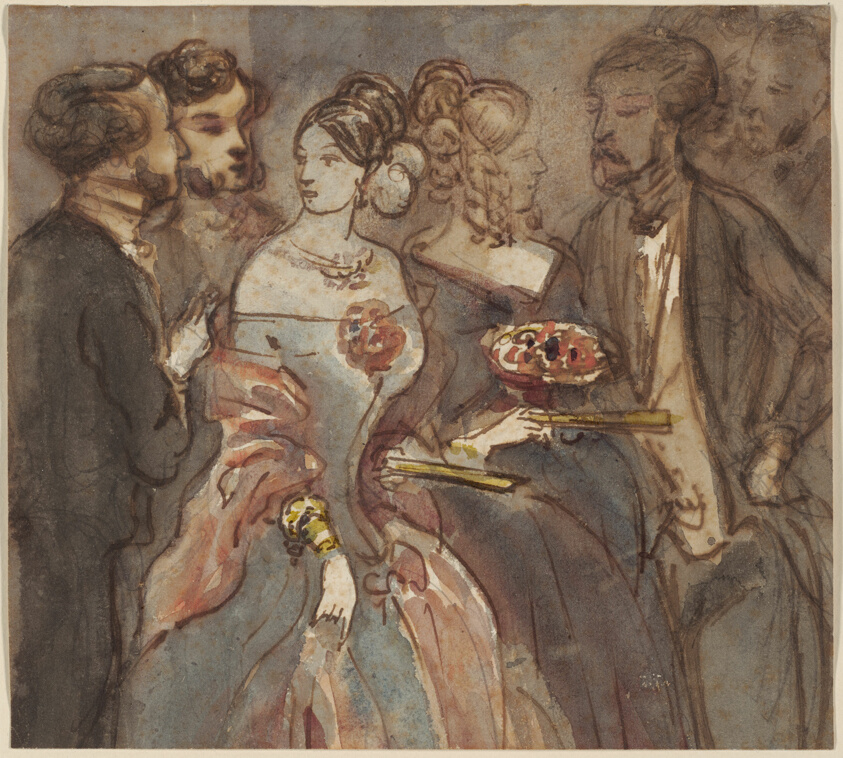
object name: Drawing and Watercolor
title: Reception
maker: Constantin Guys (French, 1802-1892)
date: 1850/1855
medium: Pen and brown ink with brush and watercolor, over graphite, on ivory laid paper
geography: France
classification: watercolor; drawings (visual works); prints and drawing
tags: Century of Progress, world's fairs, Chicago World's Fairs